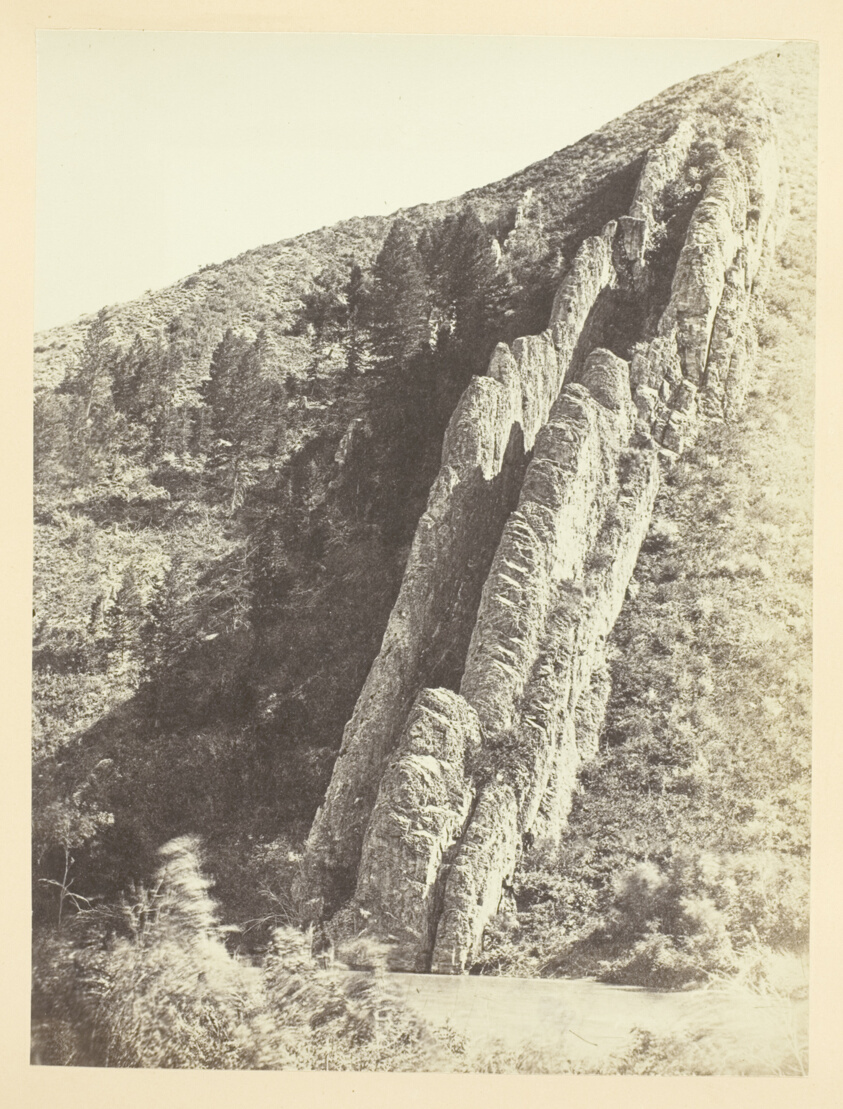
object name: Photograph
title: Serrated Rocks or Devil's Slide, (Near View)-Weber Canon, Utah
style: 19th century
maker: Andrew J. Russell; American, 1830–1902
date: 1868/69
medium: Albumen print, pl. XXI from the album "Sun Pictures of Rocky Mountain Scenery" (1870)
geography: United States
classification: photograph; albumen silver print; photography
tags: Collected by Hugh Edwards